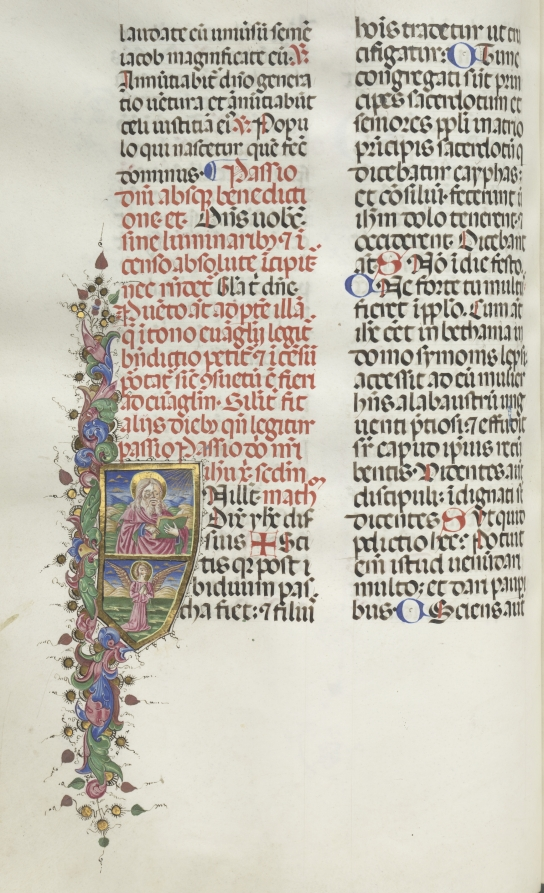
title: Missale: Fol. 116: Saint Matthew with Angel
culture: Italy, Perugia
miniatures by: Bartolommeo Caporali (Italian, c. 1420–1503)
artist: assisted by Giapeco Caporali (Italian, d. 1478)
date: 1469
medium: ink, tempera and burnished gold on vellum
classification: Bound Volume